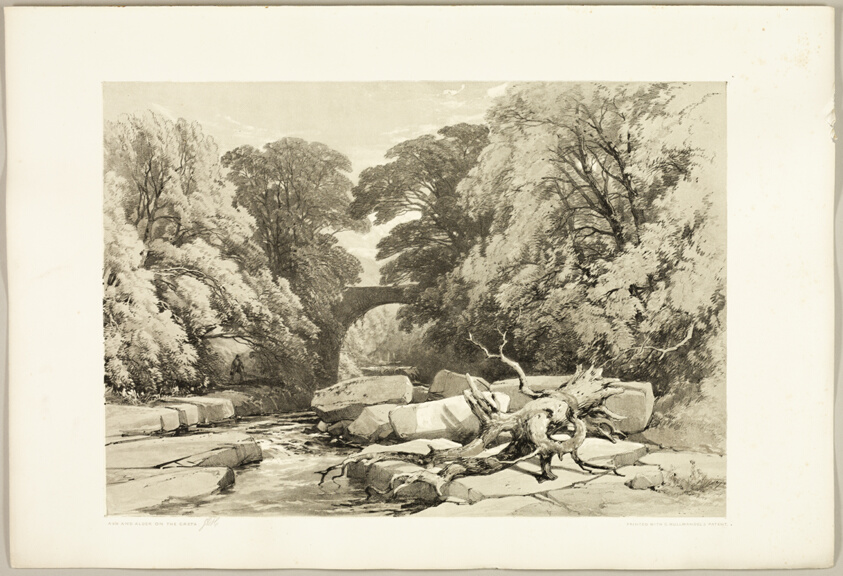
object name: Print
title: Ash and Alder on the Greta, from The Park and the Forest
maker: James Duffield Harding (English, 1798-1863); printed by Charles Joseph Hullmandel (English, 1789–1850); published by Thomas McLean (English, 1788–1875)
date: 1841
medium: Lithograph in black, with gray tint from a second plate, on ivory wove paper, laid down on ivory wove paper (chine collé)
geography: England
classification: lithograph; print; prints and drawing